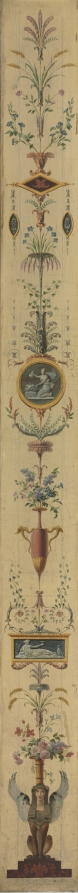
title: Decorative Panel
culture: France, 18th century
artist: Pierre Rousseau (French, 1751–1829)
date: 1790s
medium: oil on canvas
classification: Painting